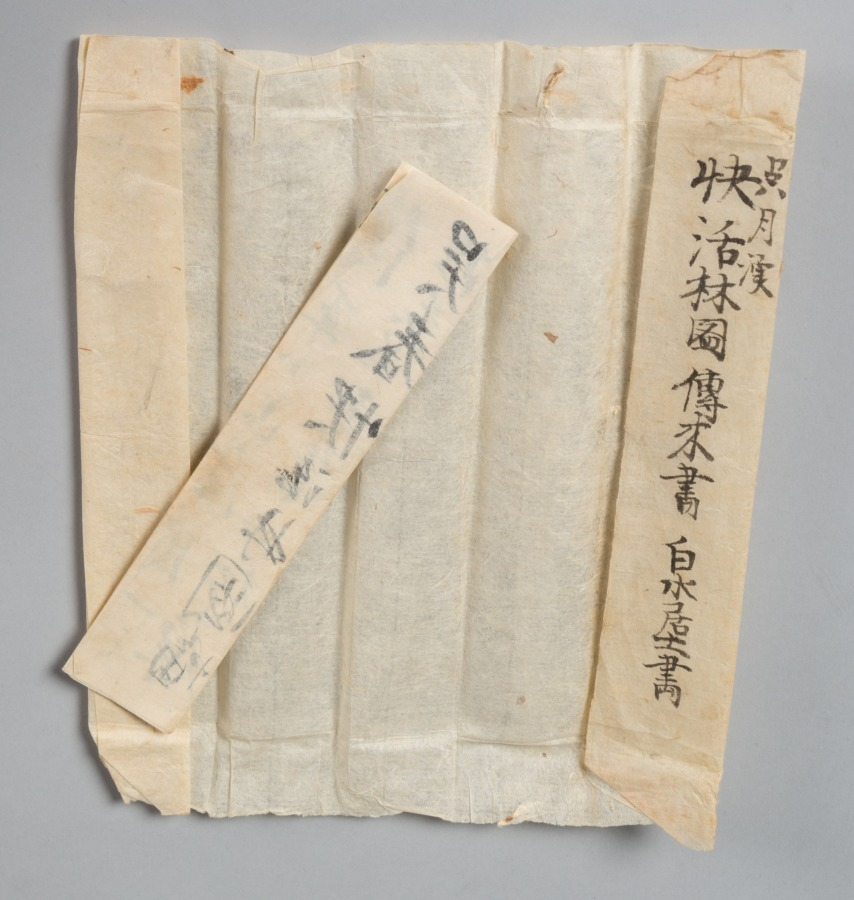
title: Happy Forest, from Water Margin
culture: Japan, Edo period (1615–1868)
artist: Matsumura Goshun (Japanese, 1752–1811)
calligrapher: and Amenomori Shōteki (Japanese, 1731–1786)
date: late 1700s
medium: hanging scroll; ink and color on paper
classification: Painting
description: The Chinese literary classic Water Margin is set in the 1120s and tells the story of 108 outlaws who first rebel against the government and then join forces with it. This painting depicts an episode in which hero Wu Song reclaims the tavern Happy Forest for its rightful owner, the prison warden’s son, Shi En. To prepare for the fight, Wu Song drinks a lot of wine. The painting was inscribed with a quote in which an ally describes Wu Song’s fighting style. It reads as follows: Where his twin fists rise, clouds and thunder roar, When his flying kick comes, wind and rain tremble.